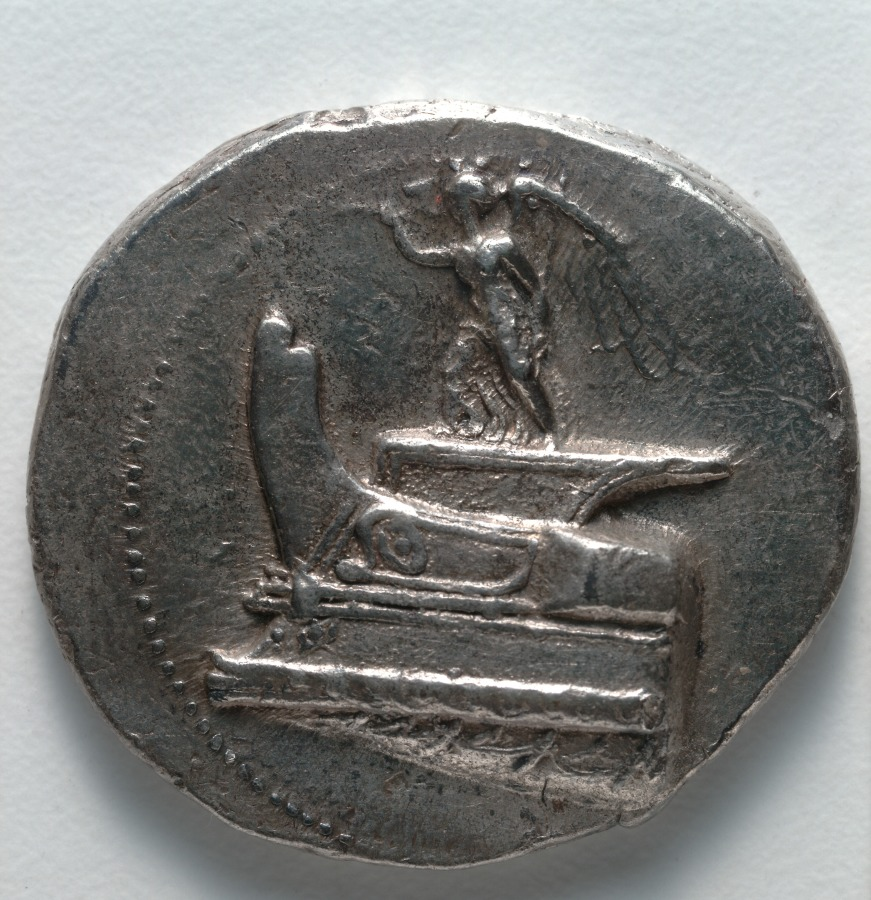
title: Tetradrachm: Nike on Ship's Prow (obverse); Poseidon (reverse)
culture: Greek, Macedonian, minted at Salamis (Cyprus), reign of Demetrios Poliorketes ("The Beseiger")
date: c. 300–295 BCE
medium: silver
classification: Coins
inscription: ΒΑΣΙΛΕΩΣ | ΔΗΜΗΤΡΙΟΥ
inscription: X perpendicular to Ρ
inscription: ΗΡ